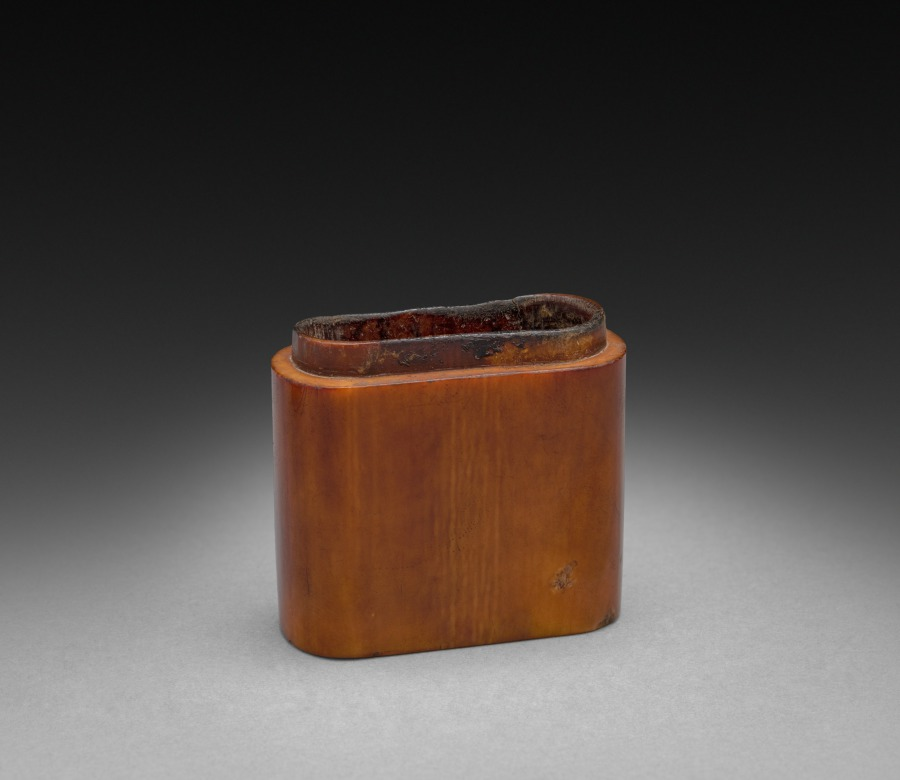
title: Box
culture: China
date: early 1900s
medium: ivory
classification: Ivory